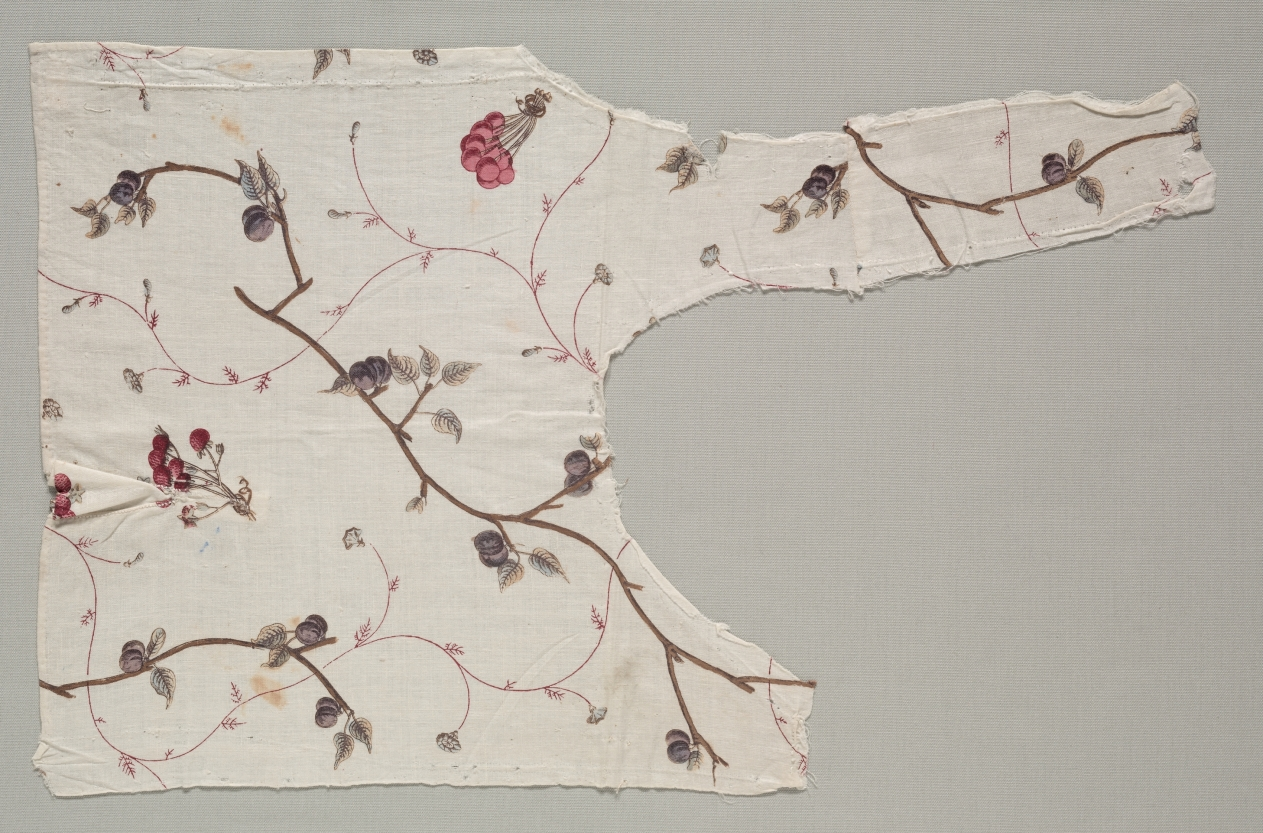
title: Fragment of a Bodice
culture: France, late 18th century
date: c. 1775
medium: woodblock print on cotton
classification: Textile